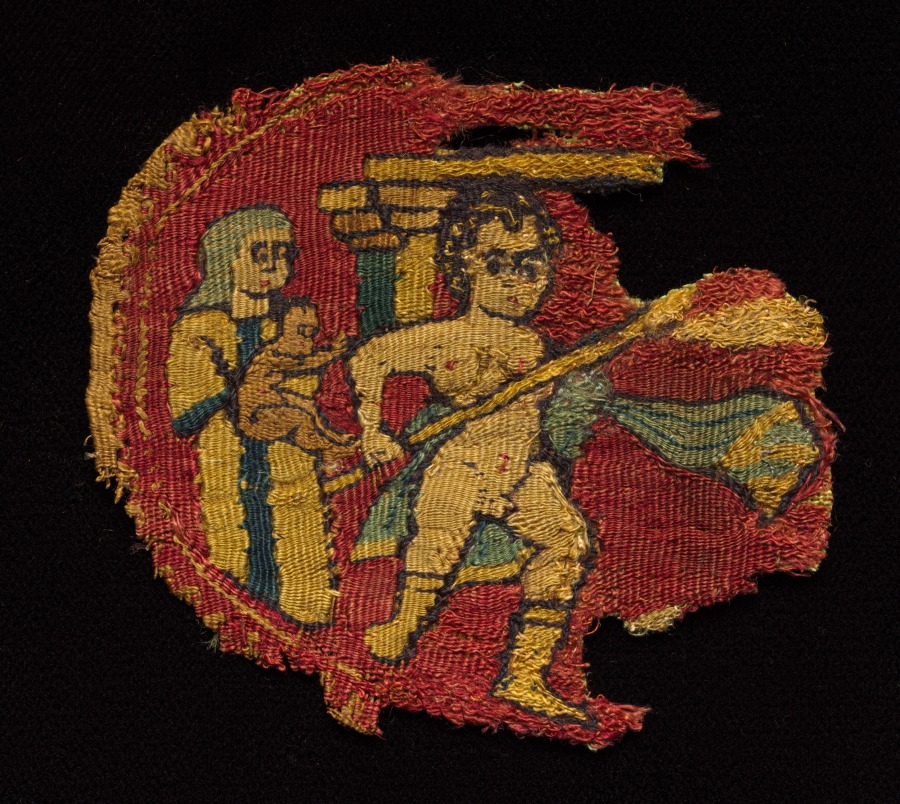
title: Four Segmenta from a Tunic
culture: Egypt, Umayyad period (661–750)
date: 650 – 750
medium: tapestry weave; wool and linen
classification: Textile